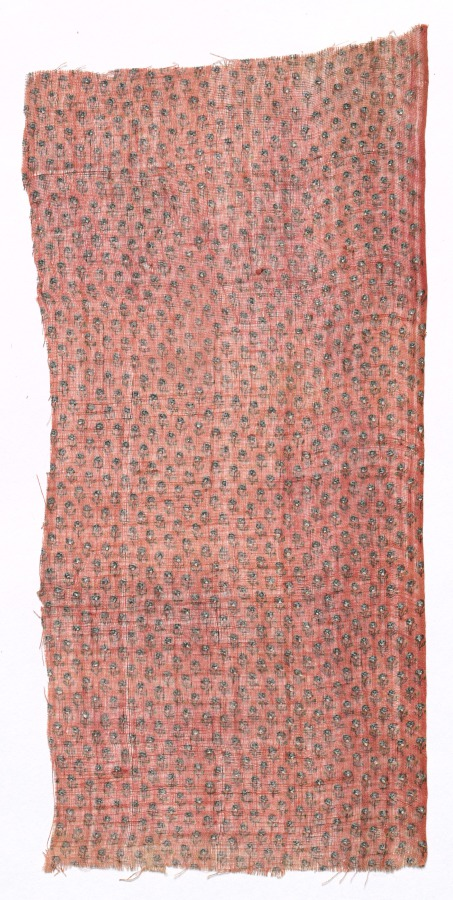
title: Fragment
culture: India, Rajasthan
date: 1800s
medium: Block printed and overpainted with silver leaf (varak) on dyed plain weave muslin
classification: Textile